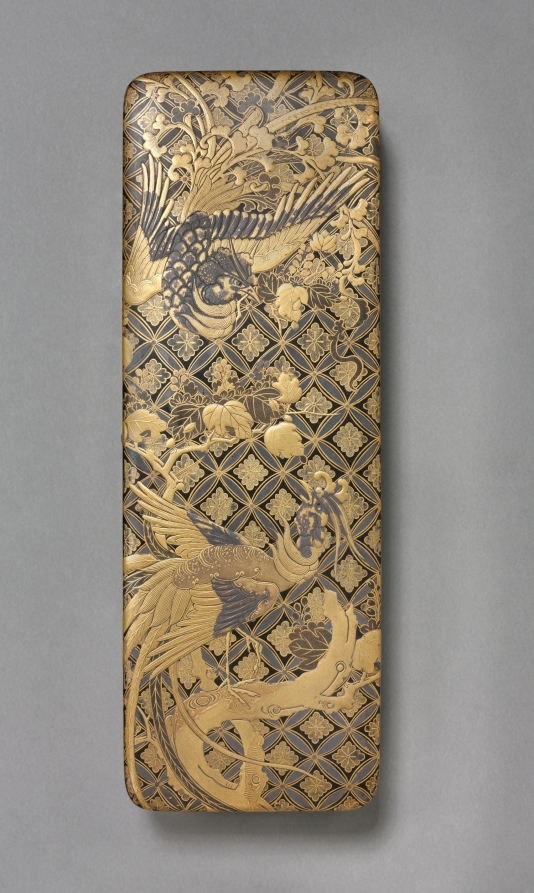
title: Letter Box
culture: Japan, Edo period (1615–1868)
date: 1615–1868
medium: lacquer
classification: Lacquer